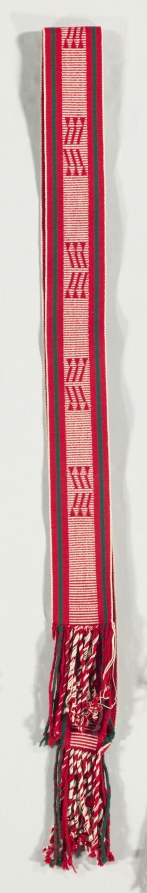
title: "Navajo Style" Belt/ Sash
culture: America, Native North American, Southwest, Navajo, Post-Contact, Early Period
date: c. 1900–1930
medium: warp face plain weave with supplementary warp float: wool and cotton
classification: Textile